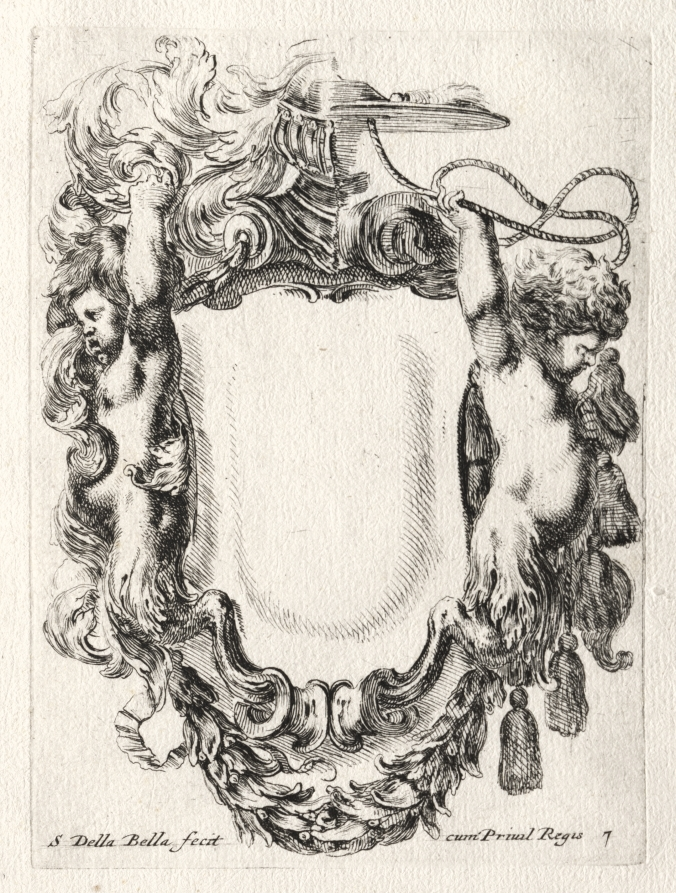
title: New Model for a Cartouche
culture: Italy, 17th century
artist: Stefano Della Bella (Italian, 1610–1664)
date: 1647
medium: etching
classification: Print